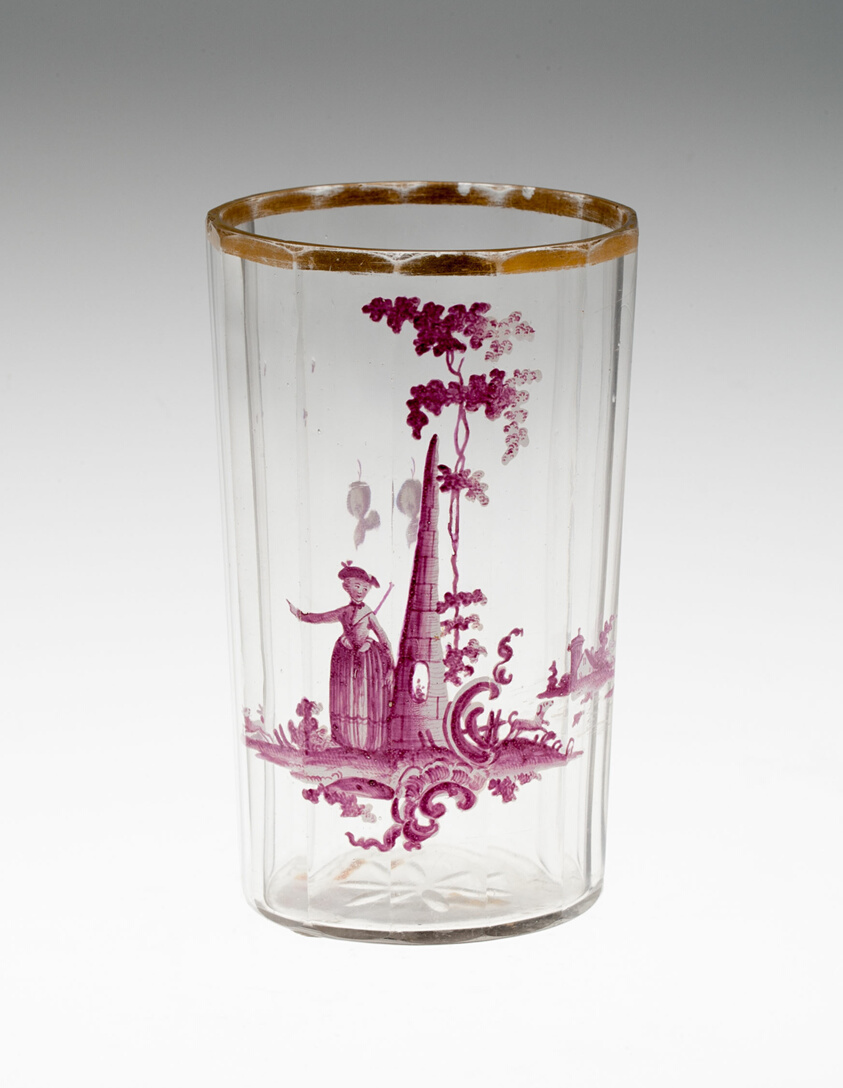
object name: Glass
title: Beaker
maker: Bohemia, Czech Republic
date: c. 1750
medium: Glass; painted with puce and white enamels and gilding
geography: Bohemia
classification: drinking vessel; glass; european decorative arts